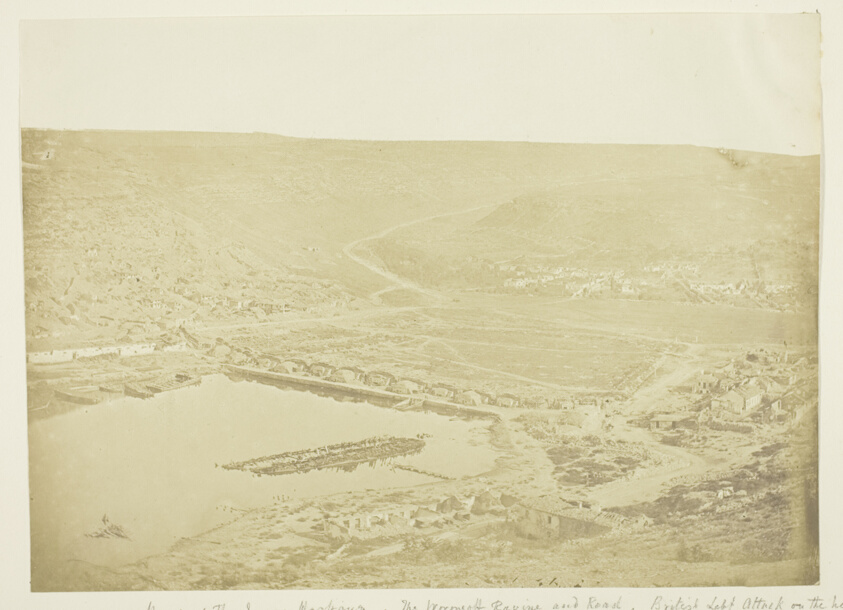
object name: Photograph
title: Crimean Photographs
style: 19th century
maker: James Robertson (Scottish, c. 1813–d. after 1881)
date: 1855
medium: Book of photographs (24) on lightly albumenized paper from collodian negatives, dated 1855; bound in leather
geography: Scotland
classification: albumen silver print; photographic process; photography; photograph